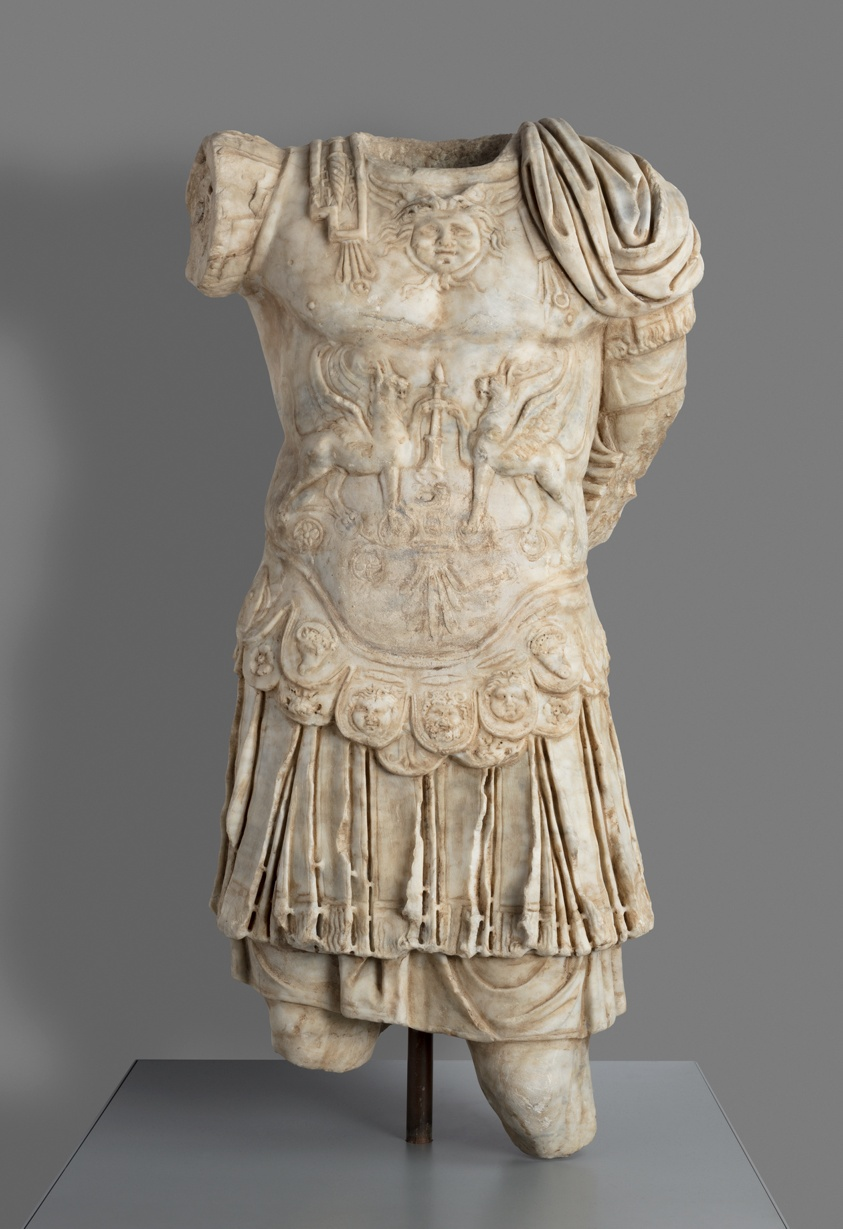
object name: Sculpture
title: Fragment of a Portrait Statue of a Man, Perhaps a Roman Emperor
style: roman (ancient, style or period)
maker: Roman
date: late 1st-early 2nd century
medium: Marble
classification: sculpture